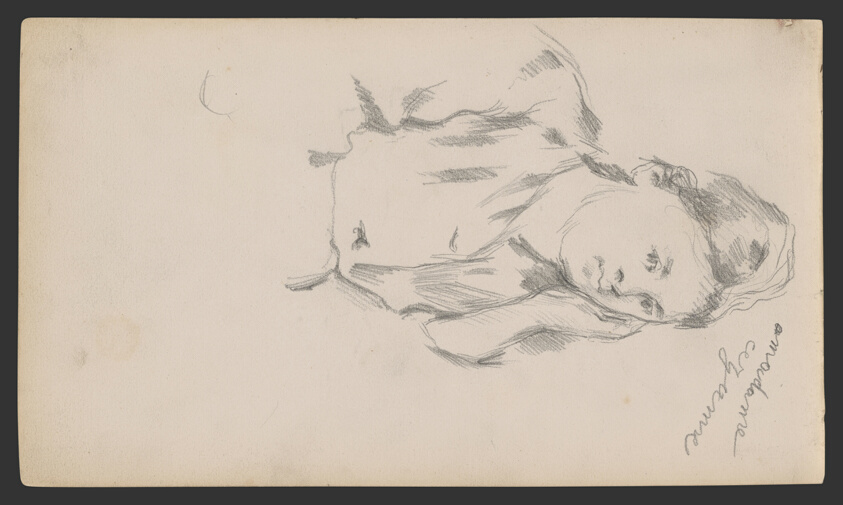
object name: Drawing and Watercolor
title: Sketchbook No. 2 (L'Estaque)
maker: Paul Cézanne; French, 1839-1906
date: 1875–86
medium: Graphite and pen and ink drawings on paper, bound into a book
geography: France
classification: sketchbook; graphite; prints and drawing; paper